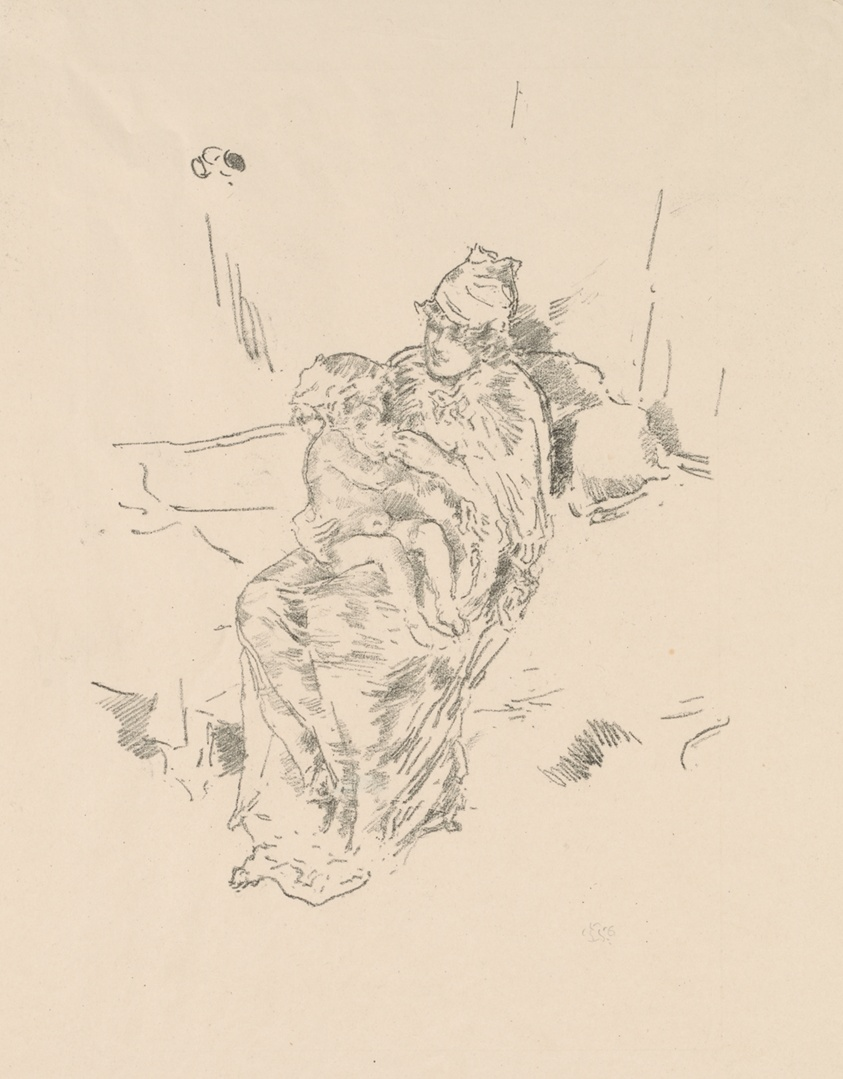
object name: Print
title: Mother and Child, No. 5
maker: James McNeill Whistler (American, 1834-1903)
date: 1895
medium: Transfer lithograph in black on ivory wove proofing paper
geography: United States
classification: transfer lithograph; lithograph; print; prints and drawing; paper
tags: mothers, children